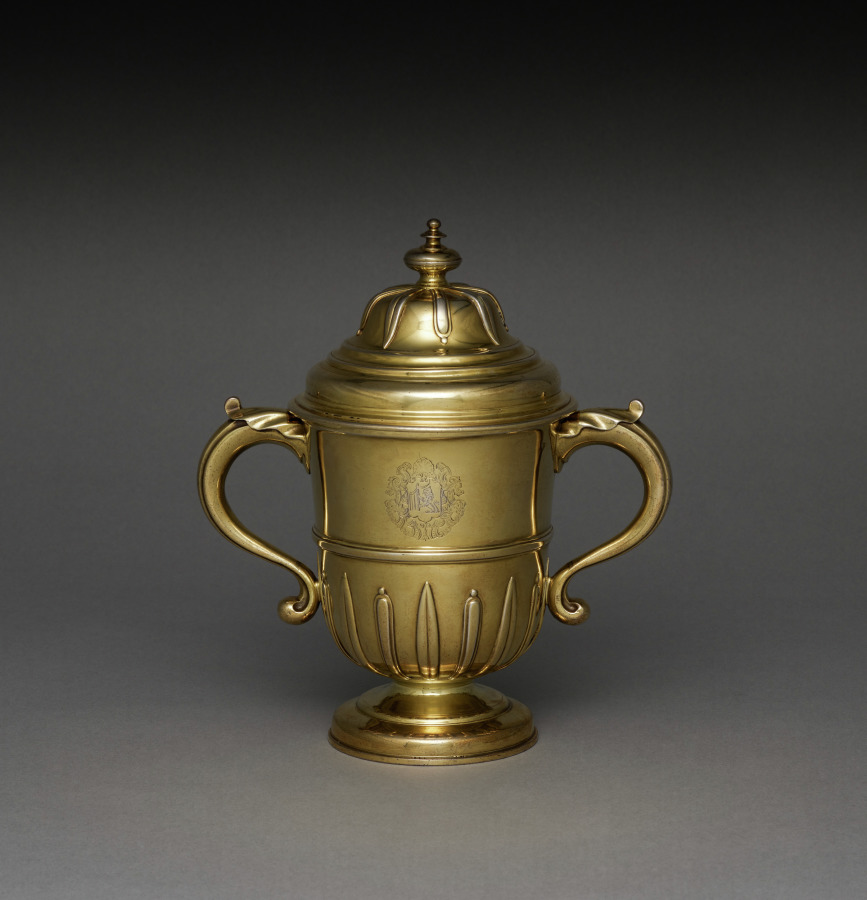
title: Covered Cup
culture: England, London, 18th century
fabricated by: Gabriel Sleath (British, 1674–1756)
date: 1723–1724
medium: silver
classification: Silver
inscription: engraved in the center of the cup is a demi-lion, rampant passant, holding an unknown object on an irregularly shaped shield surrounded by baroque manteling. In style, it is appropriate for date of cup but does not appear a true coat of arms. On the cover is a crest consisting of a demi-lion, rampant passant, between open buffalo horns. These heraldic devices perhaps refer to some entity rather than an individual.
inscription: Hallmarks stamped on side: "G", two unidentifiable, "H".